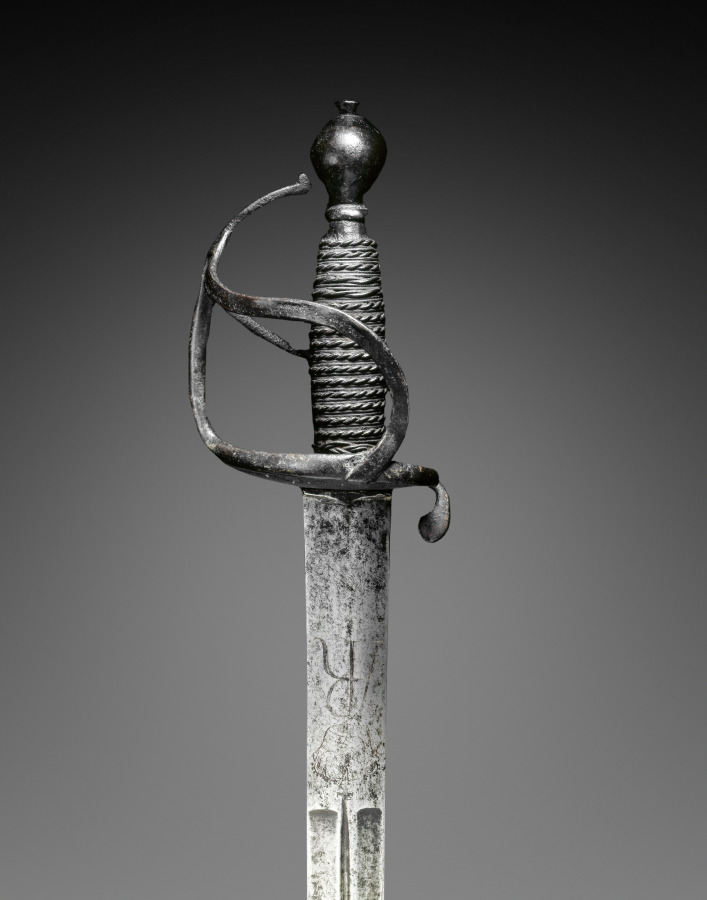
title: Cavalry Sword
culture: Germany, Saxony, 18th century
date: c. 1700–30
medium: steel (vestiges of blueing and gilding on hilt); wire grip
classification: Arms and Armor